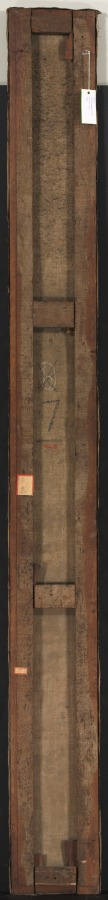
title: Decorative Panel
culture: France, 18th century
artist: Pierre Rousseau (French, 1751–1829)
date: 1790s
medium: oil on canvas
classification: Painting